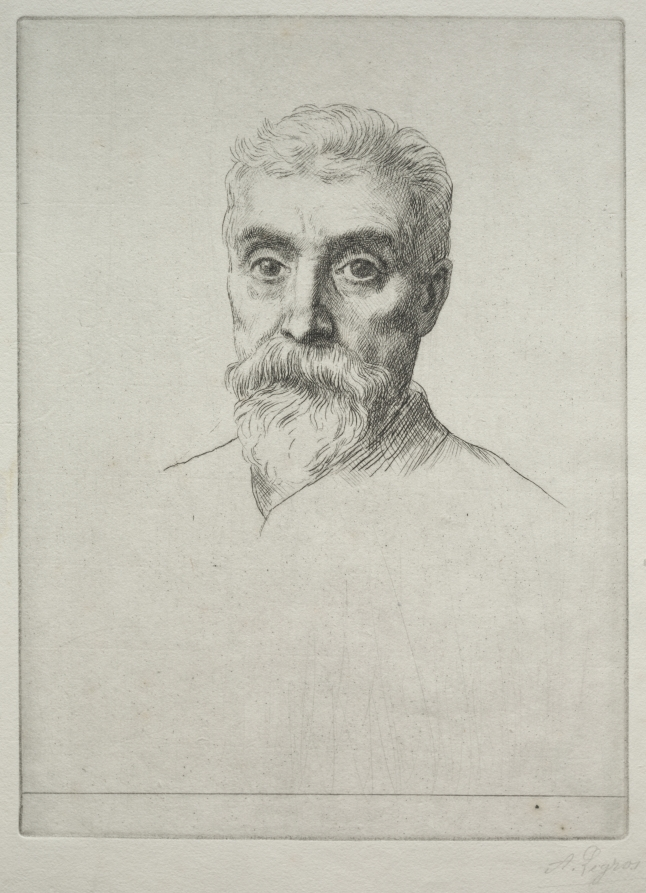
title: Portrait of Sir Hiram S. Maxim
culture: France, 19th century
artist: Alphonse Legros (French, 1837–1911)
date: c. 1857–1911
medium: drypoint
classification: Print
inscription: Signed in pencil